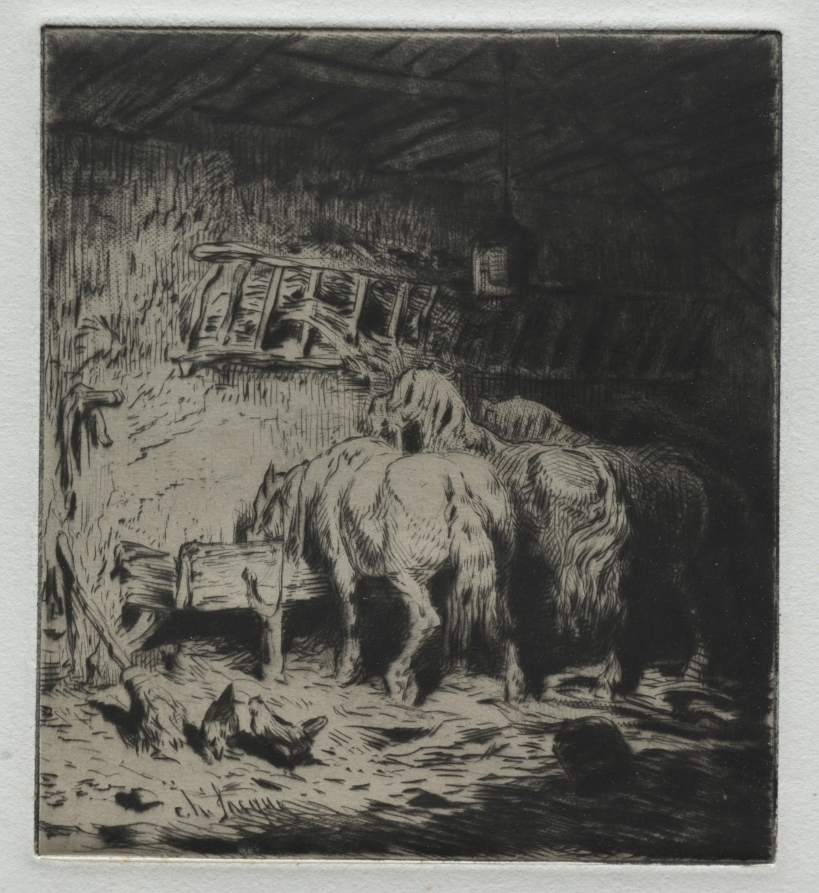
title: The Stable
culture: France, 19th century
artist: Charles-Émile Jacque (French, 1813–1894)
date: 1848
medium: etching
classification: Print